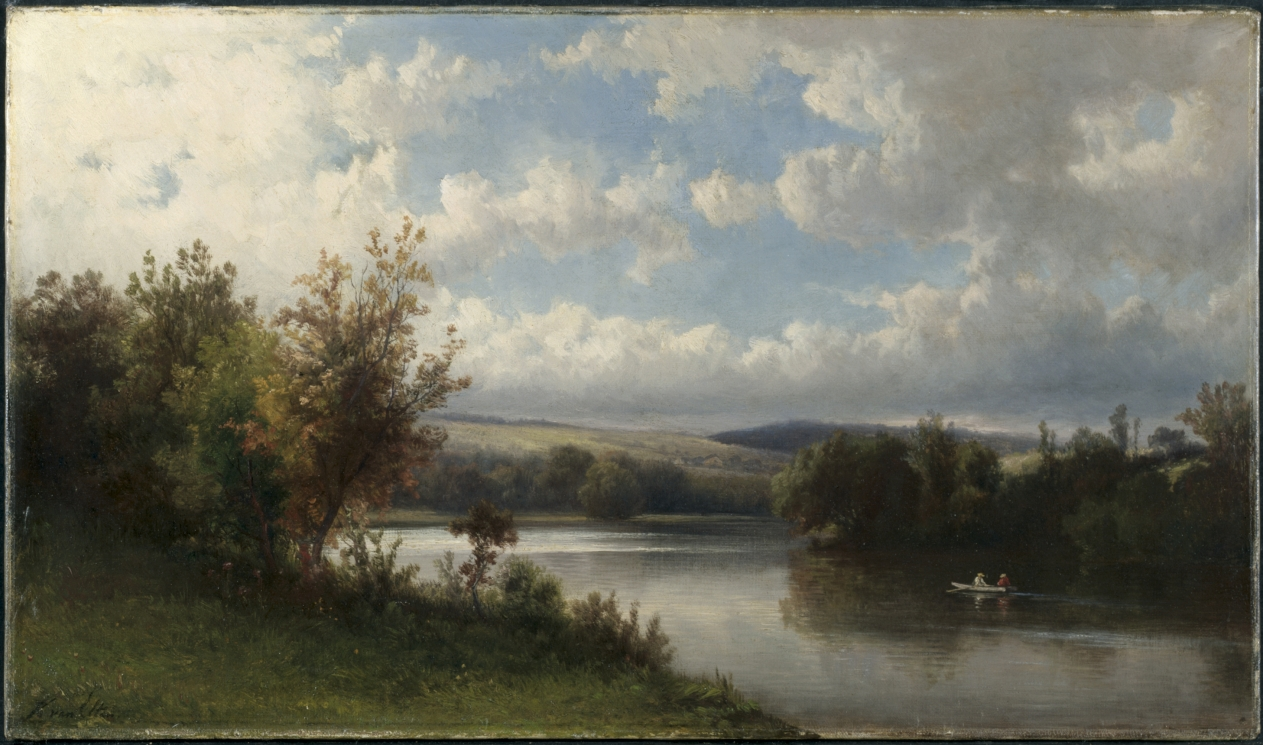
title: Landscape near Granby, Connecticut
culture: America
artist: Hendrik Dirk Kruseman van Elten (American, born The Netherlands, 1829–1904)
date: 1870s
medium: oil on canvas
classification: Painting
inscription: signed lower left: K. van Elten; graphite inscription on the bottom tacking margin at the left side: "Milford river"